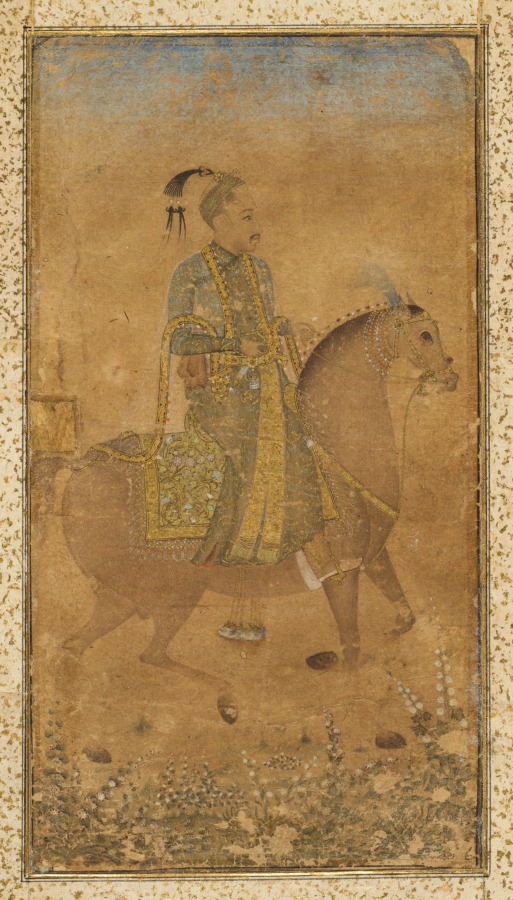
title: Sultan Abdullah Qutb Shah (1614-74) on Horseback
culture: Southern India, Golconda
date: c. 1635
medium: Ink, watercolor, and gold on paper, mounted with gold-sprinkled borders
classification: Painting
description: Sultan Abdullah Qutb Shah came to the throne of Golconda at the age of twelve and ruled until 1635 when the Mughal emperor Shah Jahan invaded the Deccan. Although Sultan Abdullah Qutb Shah kept his position, he did so under conditions named by Shah Jahan that included the payment of tribute money, conversion to Sunni Islam, and the presence of a Mughal political agent at the Golconda court. In this watercolor portrait, executed with subdued colors that complement the gold accents, the young Sultan wears a diaphanous shawl over his richly embroidered robe. His horse is almost as lavishly dressed in decorative trappings and jewels as his rider.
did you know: Specks of gold are sprinkled around the edges of this portrait.